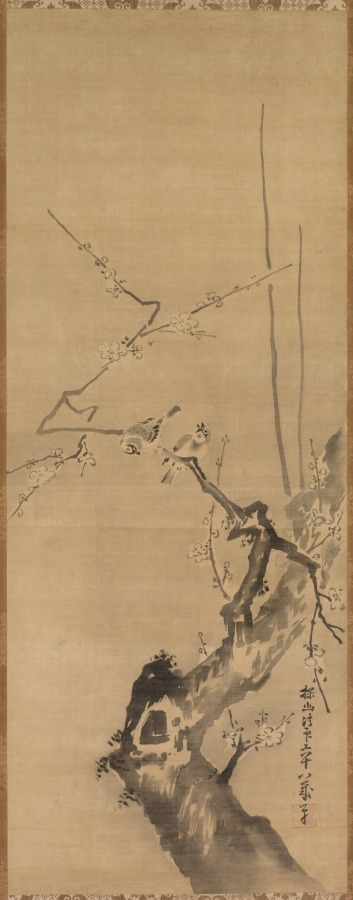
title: Sparrows on Blossoming Plum; A Sage with Tiger; Chinese Bird on Snow-Laden Branch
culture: Japan, Edo period (1615–1868)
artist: Kano Tan’yū (Japanese, 1602–1674)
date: 1661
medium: Triptych of hanging scrolls; ink and slight color on silk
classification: Painting